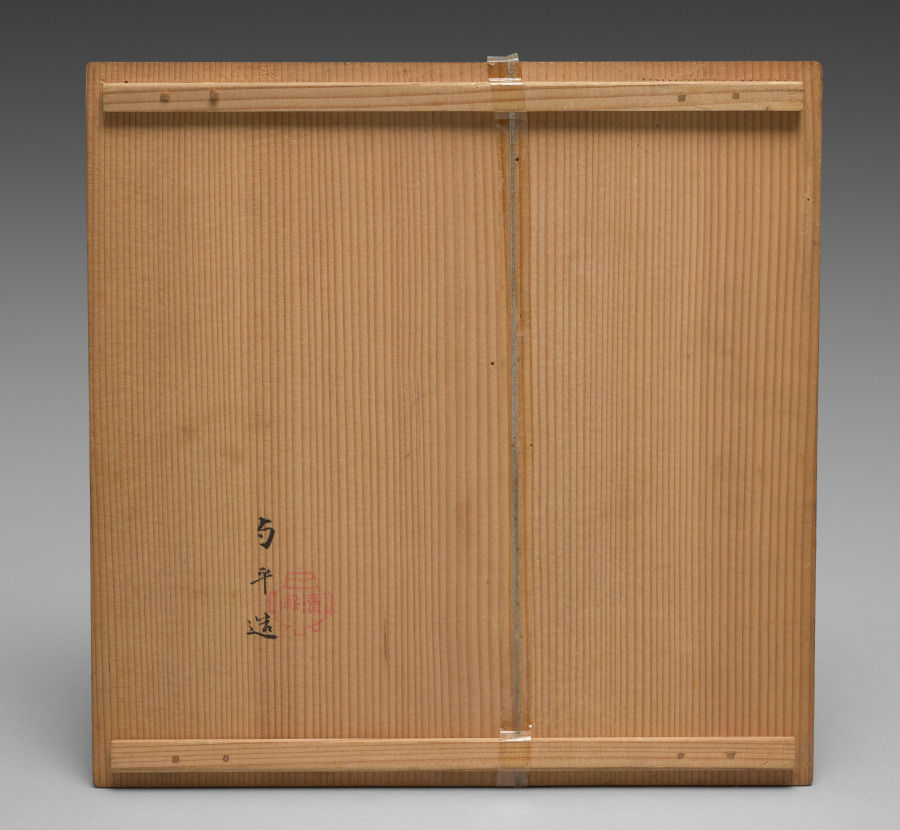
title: Dining Set with Plum Blossoms and Cracked-Ice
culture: Japan, Edo period (1615–1868) to Meiji period (1868–1912)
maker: Seifū Yohei II (Japanese, 1844–1878)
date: 1875–78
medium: Porcelain with molded designs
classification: Ceramic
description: Each item in this set has a delicate low-relief design of flowering plum branches over scattered, intersecting lines meant to resemble the cracked-ice surface of a frozen body of water and is signed on the base in gold pigment. While Yohei II produced many fine works in underglaze blue, like those produced by Kiyomizu Shichibei, he also made works in quite different styles later in his career, from the early 1870 s. In 1873, he was appointed purveyor to the Industrial Center of Kyoto Prefecture, a designation associated with Kyoto’s efforts to reach an international market through the port of Kobe; and from 1875 until his death, he was involved in national-level projects to present Japanese ceramics across the world. It was during this period that Yohei III was apprenticed to Yohei II, and it has been suggested that this set may in fact be an early example of Yohei III’s work, which he signed with his teacher’s name. Decorated with flowers resembling Japanese textile motifs, the set calls to mind the design of Yohei II’s pair of vases with plum blossoms in the Victoria and Albert Museum. Here, the elaborate trees created for a formal public exhibition setting have been translated into the approachable blossoms of the genteel domestic environment. While the designs are consistent across the pieces, each raised flower petal and pistil and each incised line in the ice was done by hand, so the cups, bowls, and dishes are similar yet unique. The bottoms of two boxes once identified the set’s owner, but the information has been deliberately obscured with black ink. However, inscriptions still visible appear to indicate two occasions, once at the end of July 1886 , and once again in June 1916 , when parts of the set were requested from Hokura in Niigata Prefecture. The location corresponds to a neighborhood in the present-day city of Jōetsu. The surname Tsuji 辻 also appears on a paper tag affixed to one of the box cloths. Future research may possibly reveal more about their provenance. A vase by Yohei III in a private collection combines the formal grandeur of the Yohei II vases in the Victoria and Albert Museum with the gentler design of this dining set, placing flowering plum trees against soft, scalloped-edge clouds resembling those in golden screens.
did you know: The dining wares have a creamy white coloration that the four boxes containing them identify as Korean in style.